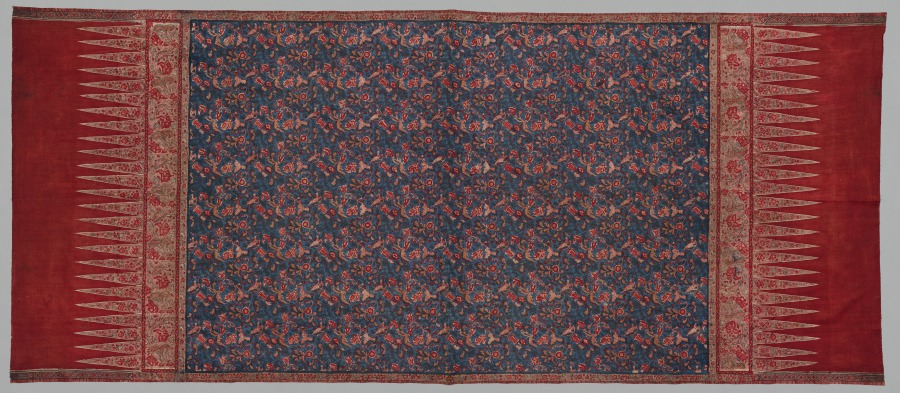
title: Hip Wrapper (tapis)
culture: India, Coromandel Coast, 1st half 19th Century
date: 1800–1850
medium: cotton; plain weave; block printed, drawn resist, painted mordants, dyed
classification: Textile